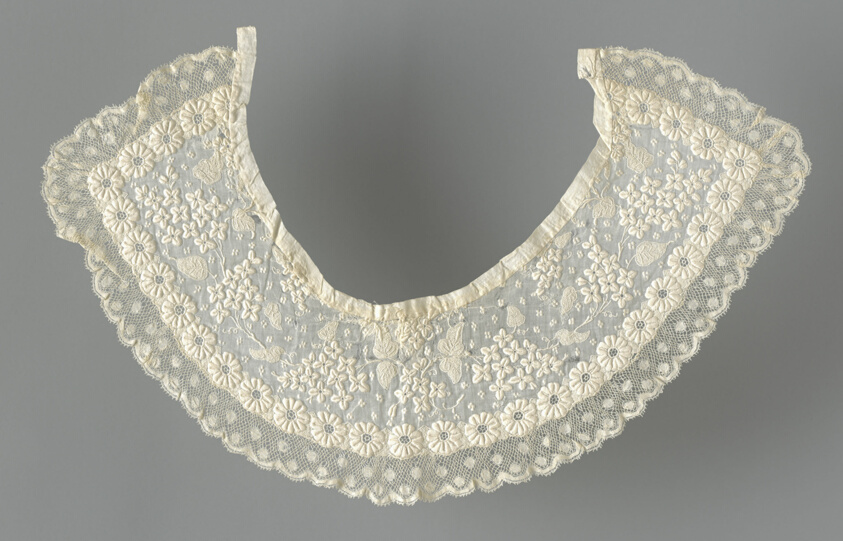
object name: Textile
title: Collar (Made From Cuffs)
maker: France (needlework) and Belgium (lace)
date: 1865/85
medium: Cotton, plain weave; embroidered in back, buttonhole, eyelet, padded overcast, padded satin, and a variety of needle lace filling stitches; edged with cotton, bobbin straight lace of a type known as "Valenciennes"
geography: France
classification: textile; needlework - lace; lace - needle